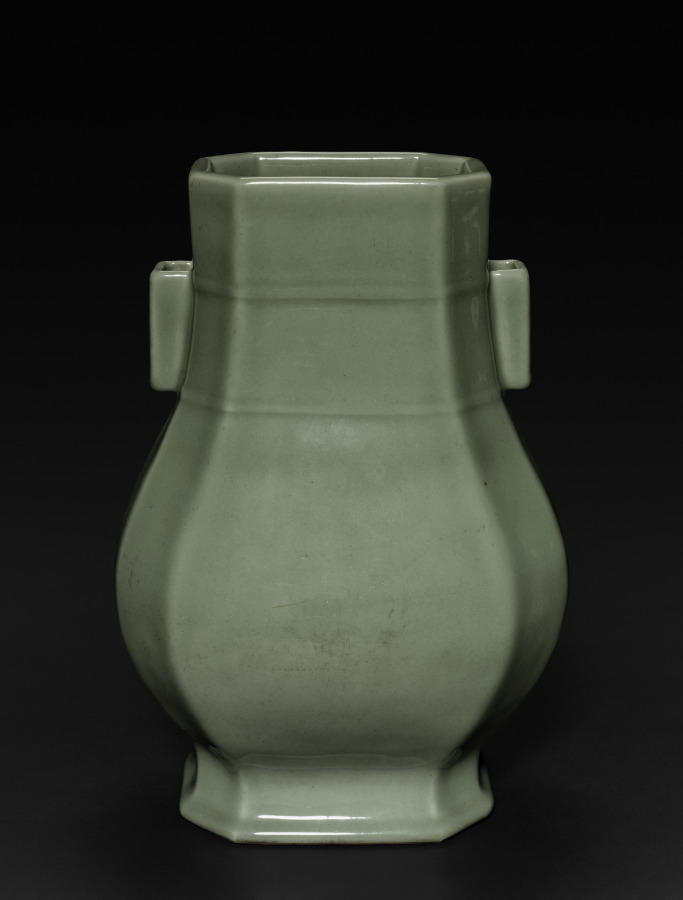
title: Suspension Vase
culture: China, Jiangxi Province, Jingdezhen kilns, Qing dynasty (1644–1911), Yongzheng mark and reign (1722–35)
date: 1723–35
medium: porcelain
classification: Ceramic